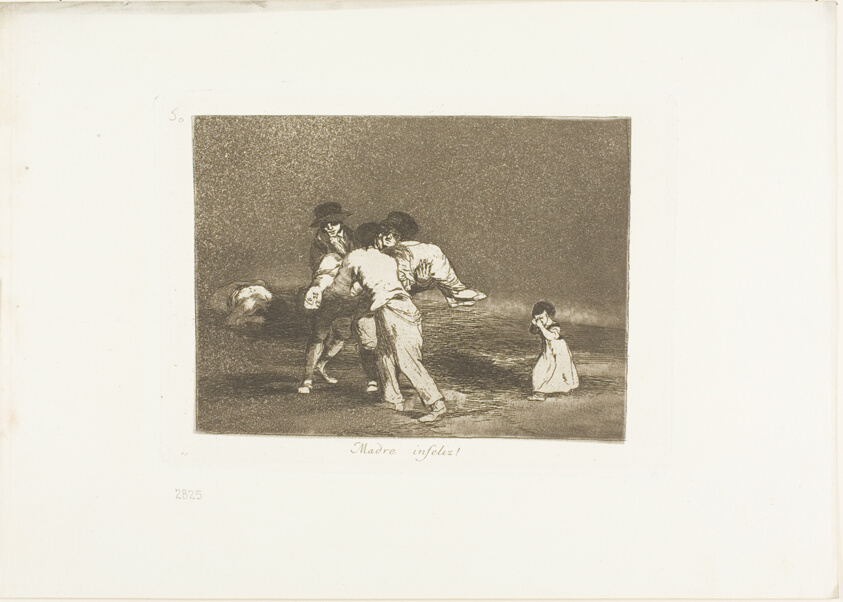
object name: Print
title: Unhappy Mother!, plate 50 from The Disasters of War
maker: Francisco José de Goya y Lucientes (Spanish, 1746-1828)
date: 1812/15, published 1863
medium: Etching, burnished aquatint and drypoint on ivory wove paper with gilt edges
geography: Spain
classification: etching; print; prints and drawing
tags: war, mothers, children